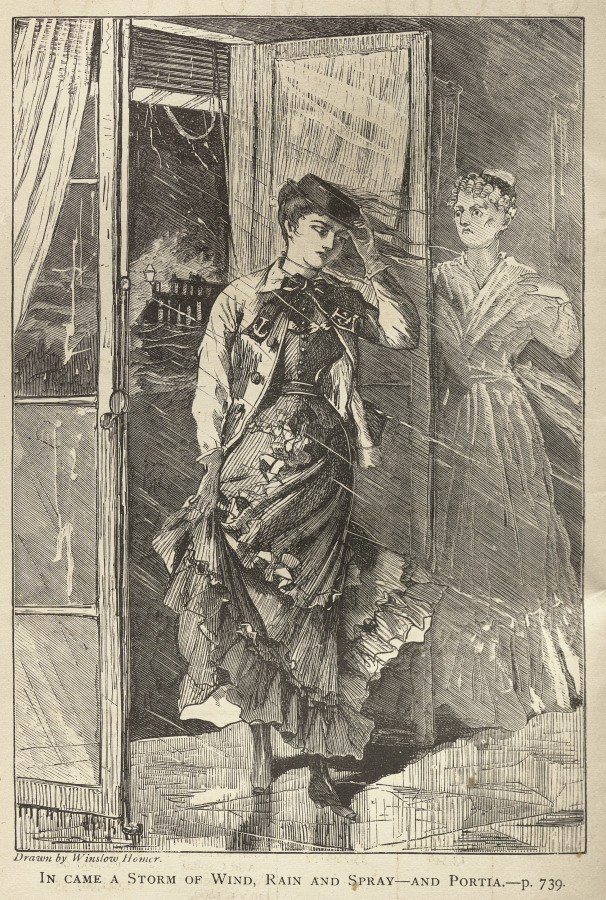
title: In Came a Storm of Wind, Rain and Spray - and Portia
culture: America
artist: Winslow Homer (American, 1836–1910)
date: 1869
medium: wood engraving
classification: Print